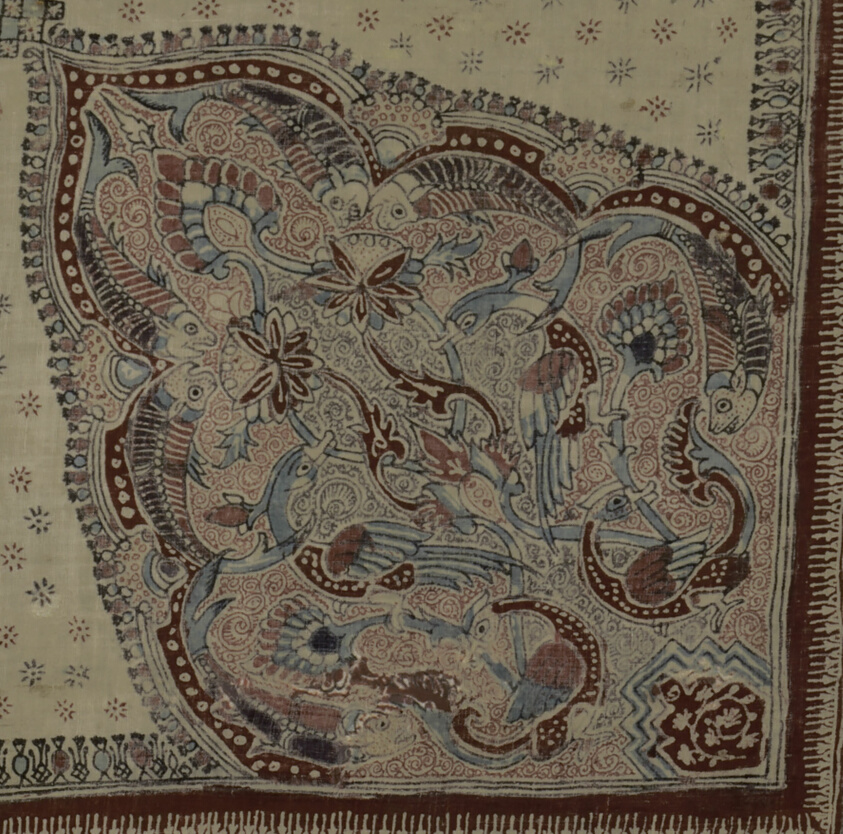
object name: Textile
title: Painted cotton with medallion and figures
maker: Deccan, India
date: 15th century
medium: cotton, plain weave; painted mordant; resist-dyed; painted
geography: India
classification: textile; weaving - printed